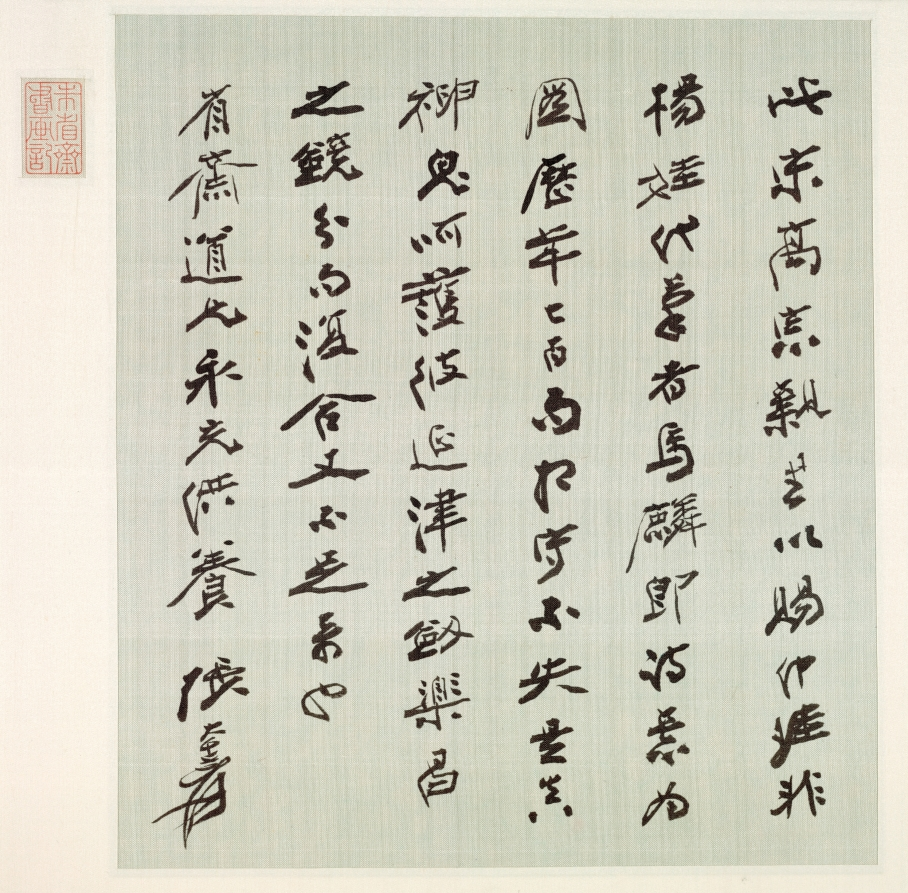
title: Poem by Wang Wei in the Cursive Script Style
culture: China, Southern Song dynasty (1127-1279)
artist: Song Lizong (Chinese, 1205–1264)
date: 1256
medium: Album leaf; ink on silk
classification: Calligraphy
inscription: 行到水窮處 坐看雲起時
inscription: The inscription between the two imperial seals reads, "Presented to Chung-kuei".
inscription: The top gourd-shaped seal has the cyclical date "bingchen" (丙辰 1256); the lower square seal is the Seal for Imperial Calligraphy.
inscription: The facing leaf has an inscription by Zhang Daqian 張大千 (1899–1983).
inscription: 1 seal of Chu Sheng-chai (20th Century) remounted onto the facing leaf to the left of the square calligraphy.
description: Poem and painting, once mounted together as one fan, exemplify the collaboration between imperial patron and court painter. Emperor Lizong’s calligraphy cites a verse from Wang Wei’s (701–761) poem, Walking to where the water ends, I sit and watch when clouds arise. Ma Lin’s response is this painting. At the water’s edge, a scholar reclines by a large rock. The view leads across the empty middle ground to a distant mountain. With sparse ink and subtly graded washes, Ma Lin visualizes the poetic verse. The painting suggests the impact of Chan aesthetics through interaction between the palace, literati-officials, and monasteries around Hangzhou. The leaf facing Emperor Lizong’s calligraphy has an inscription by Zhang Daqian (1899–1983).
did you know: Emperor Lizong had little interest in governmental affairs, but he was perhaps the finest calligrapher among the Song emperors.